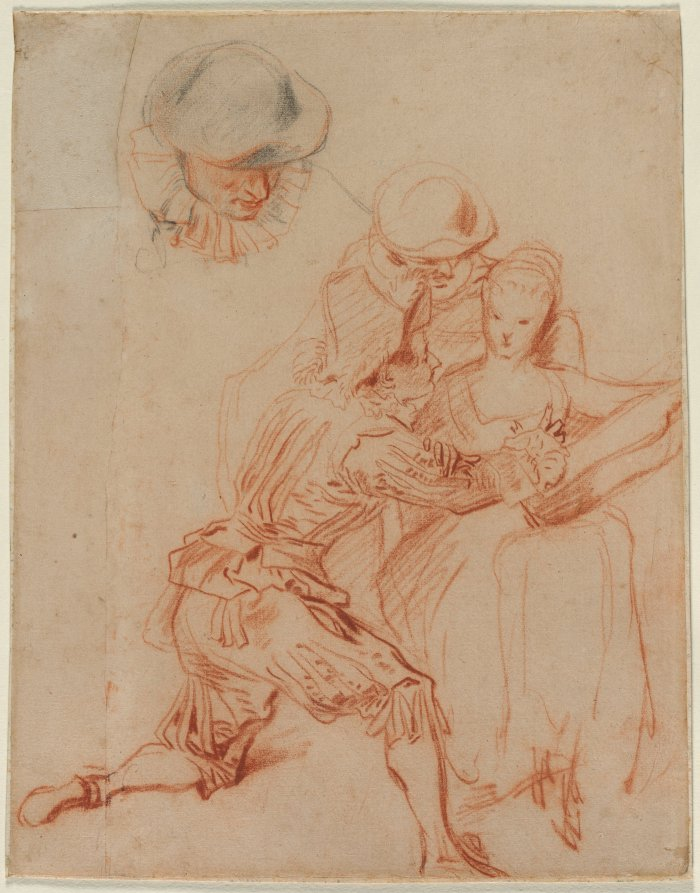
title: Study for "The Romancer" (Le Conteur)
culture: France, 18th century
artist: Jean-Antoine Watteau (French, 1684–1721)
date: c. 1716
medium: red chalk; red and black chalk (upper left figure)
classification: Drawing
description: This sheet was a preparatory study for the painting The Romancer. An actor in the costume of Mezzetin, a stock character of the commedia dell’arte (a type of satirical theatrical entertainment of Italian origin popular in aristocratic circles in 18th-century France), interrupts a guitarist with a bold sexual advance. Another actor dressed as the French pantomime stock character Pierrot peers lasciviously over the young musician’s shoulder. A more detailed study of Pierrot’s head occupies the upper left corner of the sheet, demonstrating Jean Antoine Watteau’s experimentation with how to most effectively depict a lecherous gaze.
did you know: Jean Antoine Watteau likely drew this sheet from a combination of life study and imagination, working from a model and adding other elements of his own creation.